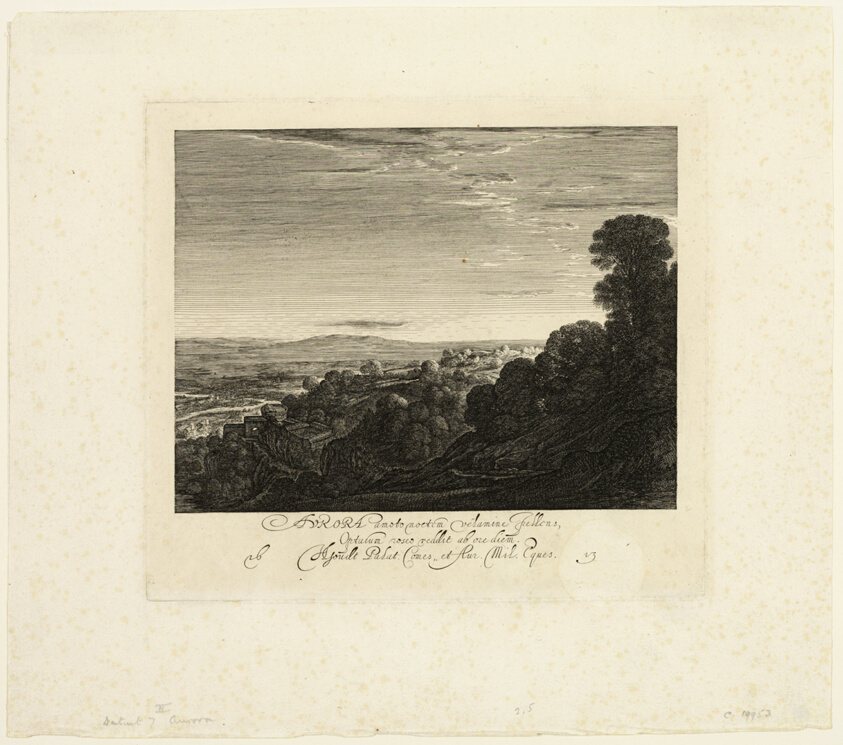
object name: Print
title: Aurora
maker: Hendrik Goudt (Dutch, 1583-1648); after Adam Elsheimer (German, 1578-1610)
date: 1613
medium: Etching and engraving in black on ivory laid paper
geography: Netherlands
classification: etching; print; prints and drawing